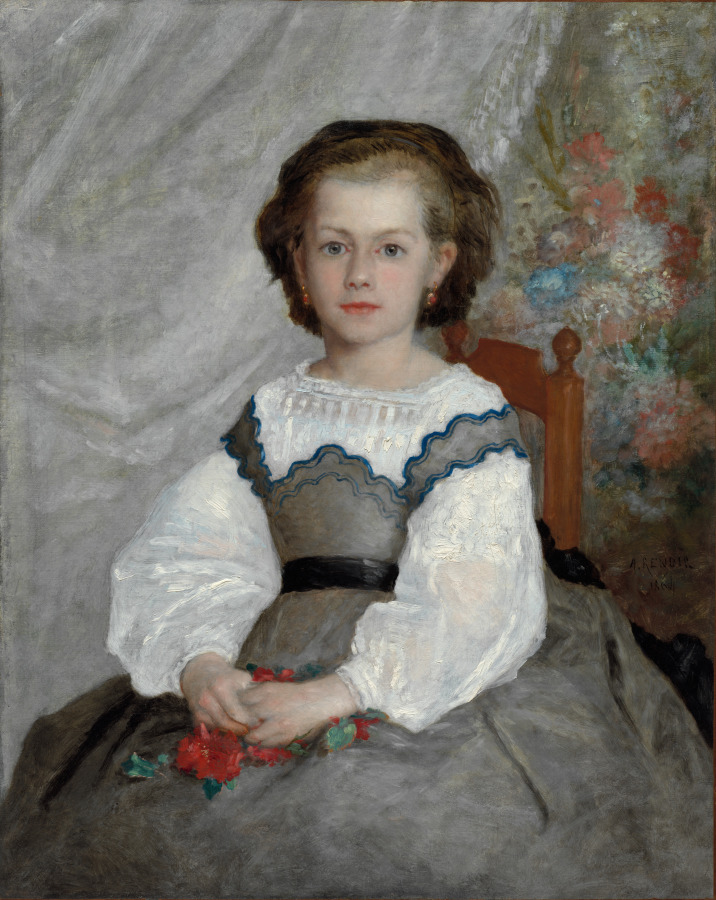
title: Romaine Lacaux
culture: France, 19th century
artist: Pierre-Auguste Renoir (French, 1841–1919)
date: 1864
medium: oil on fabric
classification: Painting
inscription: Signed center right: a. renoir / 1864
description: This painting may be Renoir's earliest signed canvas. Its sensitive display of color and light communicates an ideal of delicate, youthful beauty. The luminous tones of the background drapery and of the child's white blouse result from the artist's careful observation of reflected light and color on translucent materials. The delicate nuances of color, particularly in the young girl's face, reveal Renoir's previous training as a decorator of porcelain. He painted this portrait, commissioned by the vacationing Lacaux family, during his stay at an artist's colony in the village of Barbizon, near Paris.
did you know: The son of a poor tailor from Limoges, Renoir began his artistic career at age 13 as an apprentice to a porcelain painter.